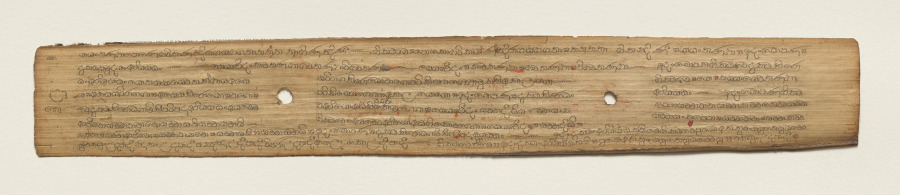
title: Leaf from a Buddhist Manuscript (recto)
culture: Sri Lanka, Singhalese, Late 17th century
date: c. 1700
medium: fiber paper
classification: Manuscript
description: Palm leaf material is still used for manuscripts in Sri Lanka. The palm leaves are prepared first by boiling them, drying them in the sun, and then rubbing them with oils. Scribes then use a metal stylus to incise the text. Then charcoal powder is wiped across the pages, filling in only the inscribed lines.